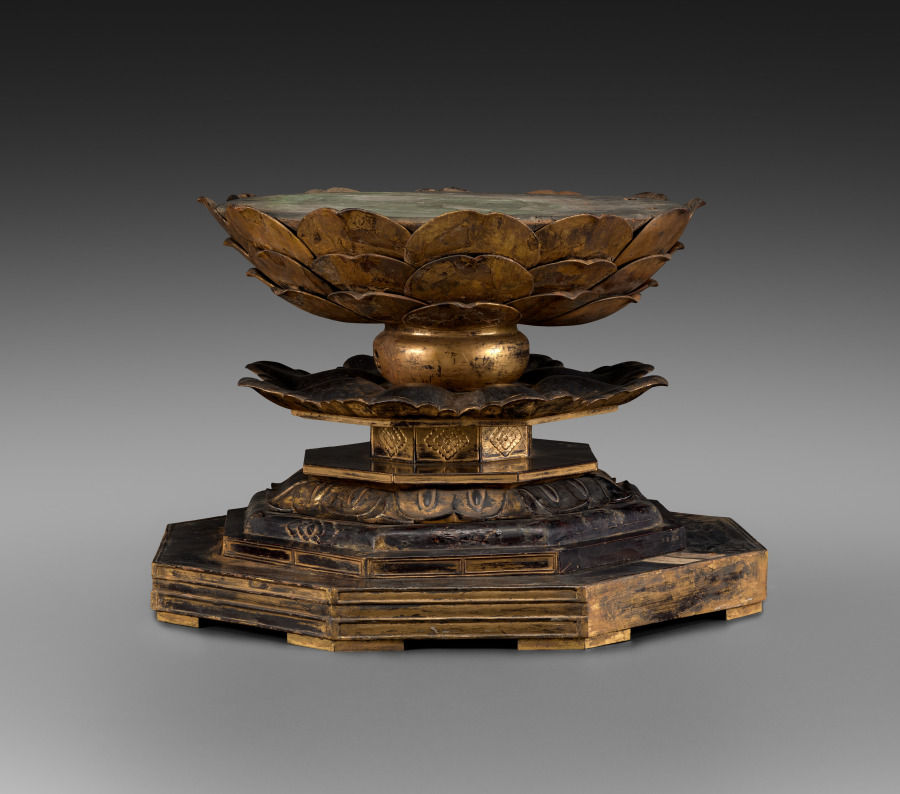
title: Seated Buddha (lotus pedestal)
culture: Japan, Heian period (794–1185)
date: 1100s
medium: gilded wood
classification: Sculpture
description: Composed of a number of hollowed-out pieces of wood that were then covered with lacquer and gilding, this sculpture would have served as the principal image of worship in a Buddhist temple hall. The Buddha Yakushi resides in the Lapis Lazuli Paradise of the East, and heals all diseases, including the ailment of ignorance. His left hand once held a medicine jar, while his right hand gestures reassurance. Seated on a lotus pedestal and backed by a mandorla and halo, the Buddha may have once been flanked by the bodhisattvas of the Sun and Moon, Nikkō and Gakkō, and protected by the Twelve Divine Generals, or Junishinshō.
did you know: This figure is depicted with a mudra, or hand gesture, that means "have no fear."